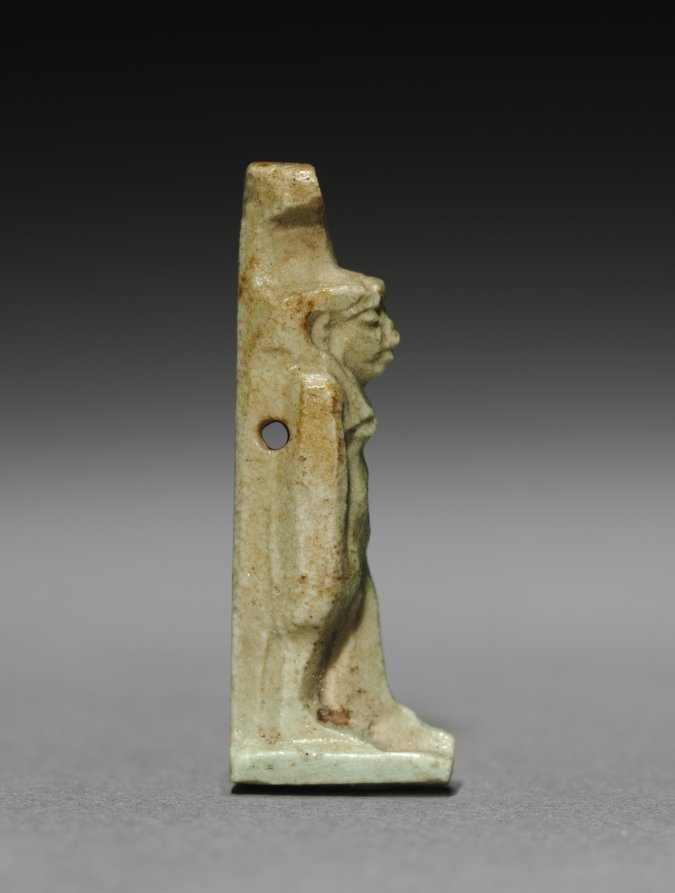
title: Amulet of Nephthys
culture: Egypt, Late period (715–332 BCE), Dynasty 30–Greco-Roman period (332 BCE–395 CE), Ptolemaic dynasty (305–30 BCE)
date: 380–30 BCE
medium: gray green faience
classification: Amulets